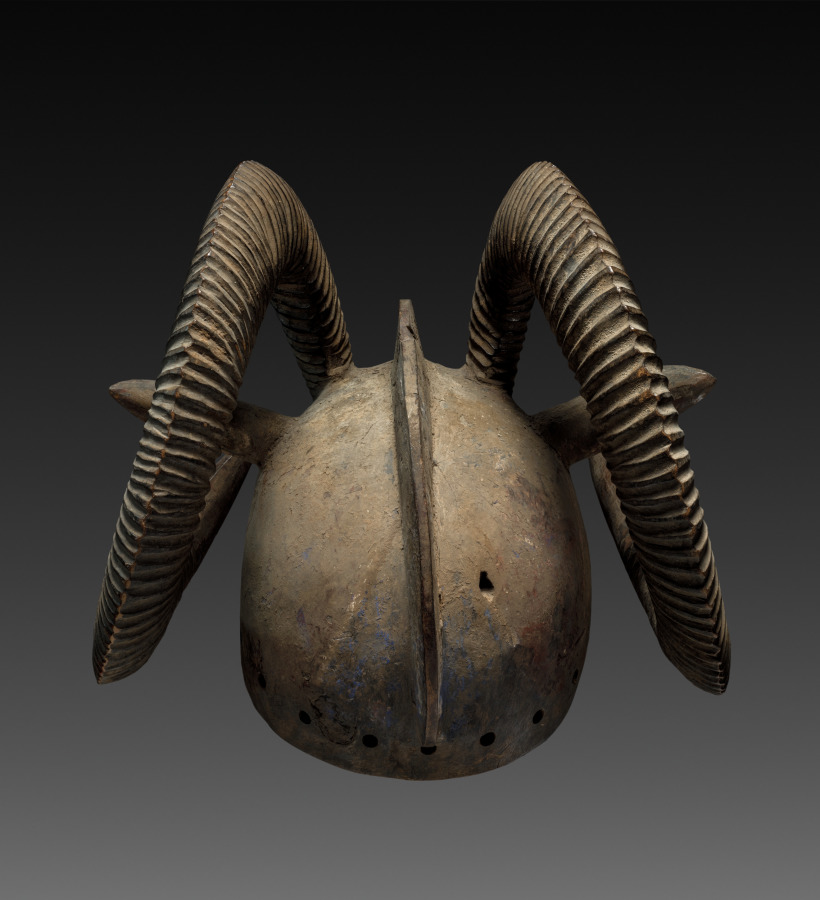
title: Ram Mask (Bolo)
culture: Africa, West Africa, Burkina Faso, Bobo-style blacksmith-carver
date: possibly early 1900s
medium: Wood and paint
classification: Mask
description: Bolo masks are primarily danced for entertainment during communal occasions like funerals, male initiations, and harvest celebrations. Comprising both animal and human features, the mask––always worn by a male dancer––refers to the cultural significance of the ram, an animal associated with male aggression across sub-Saharan Africa.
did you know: The mask was vividly painted while in use. Look closely at its surface to see traces of blue, red, and white paint.